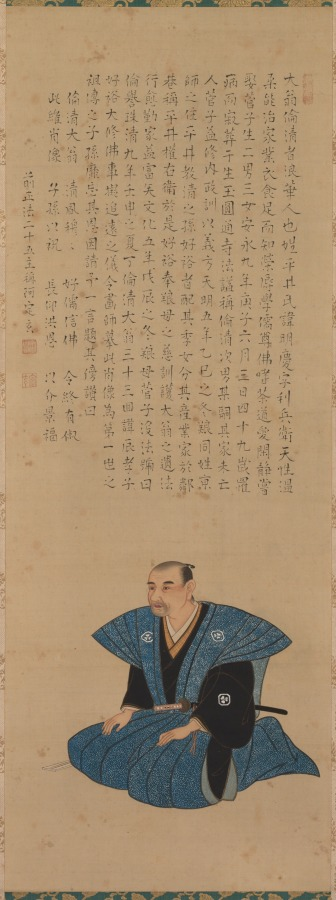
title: Portrait of Samurai-Official: Hirai Rinsei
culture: Japan, Edo period (1615–1868)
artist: attributed to Tsukioka Settei (Japanese, 1710–1786)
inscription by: Jogen (Japanese)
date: 1776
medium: hanging scroll; ink and color on silk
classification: Painting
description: In this pair of figure paintings, the artist provided generational portraits of two clan leaders from the Hirai family, accompanied by lengthy inscriptions in a distinctive calligraphic style from separate scholar-officials.